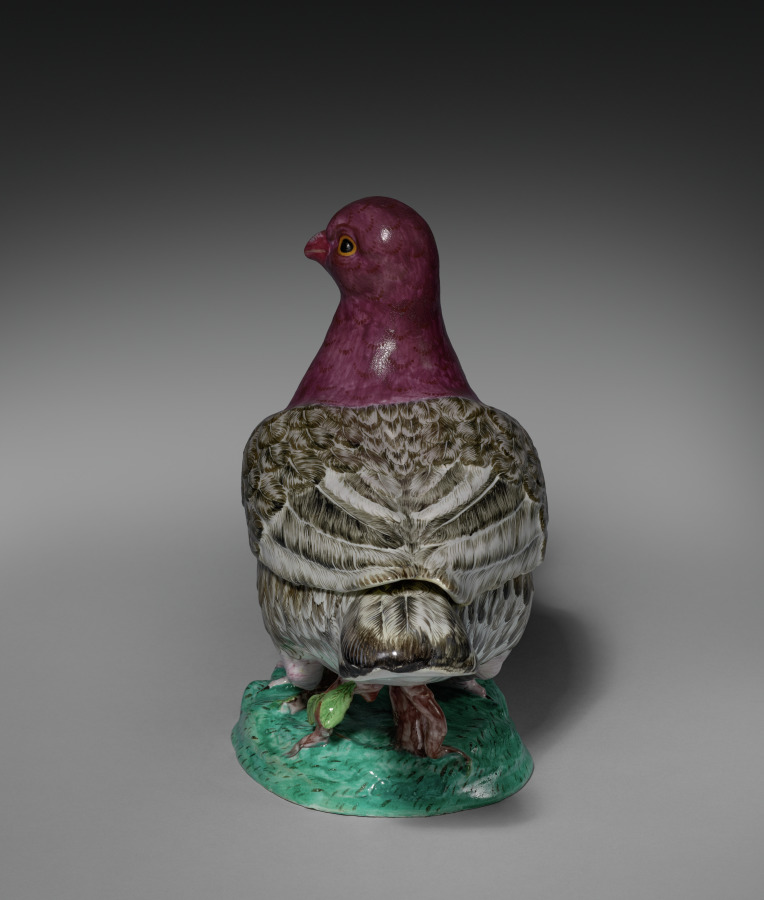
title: Covered Tureen in the Form of a Pigeon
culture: France, 18th century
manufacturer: Sceaux Factory (French, active 1748–66)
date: c. 1760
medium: Tin- glazed earthenware (faience) wth enamel decoration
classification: Ceramic